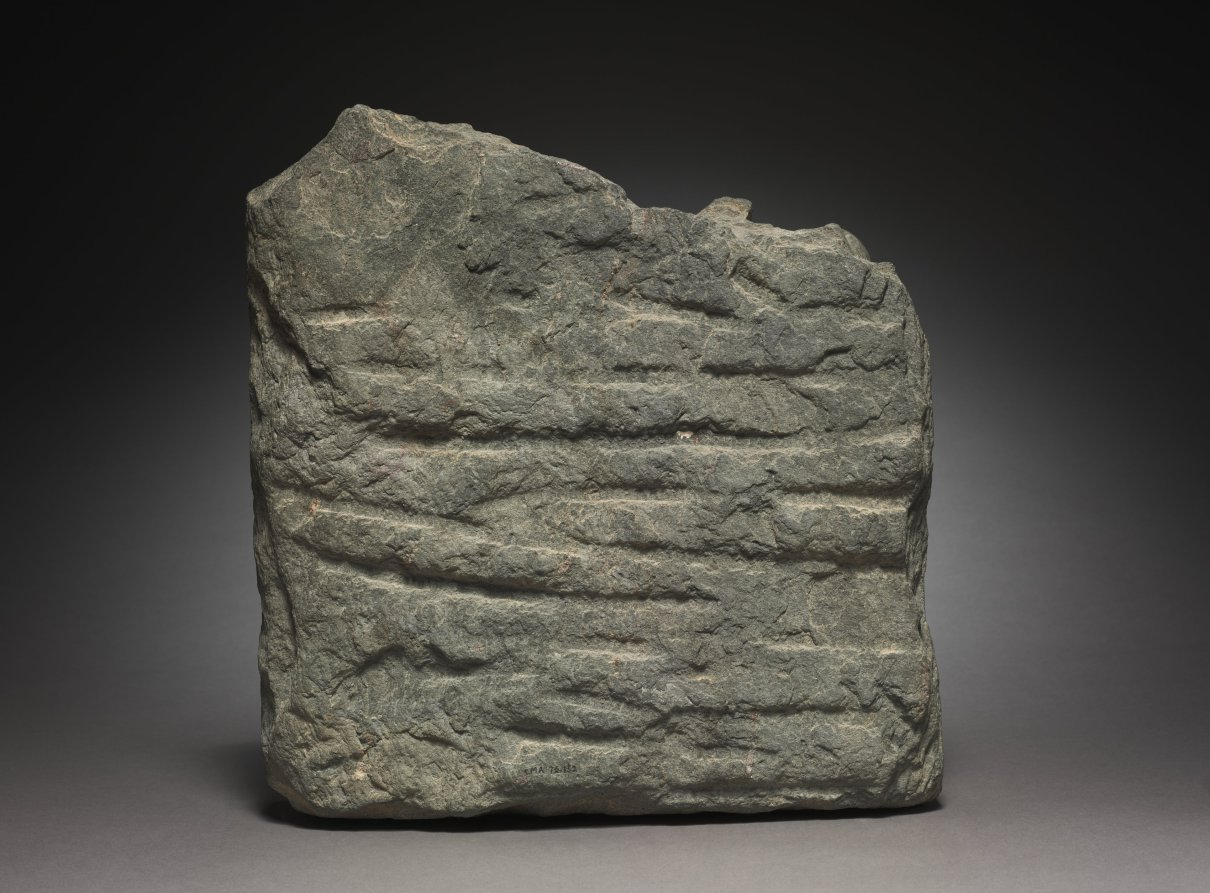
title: Base for a Seated Buddha with Figures of Ascetics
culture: Pakistan, Gandhara, Kushan period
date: c. late 100s CE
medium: gray schist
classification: Sculpture